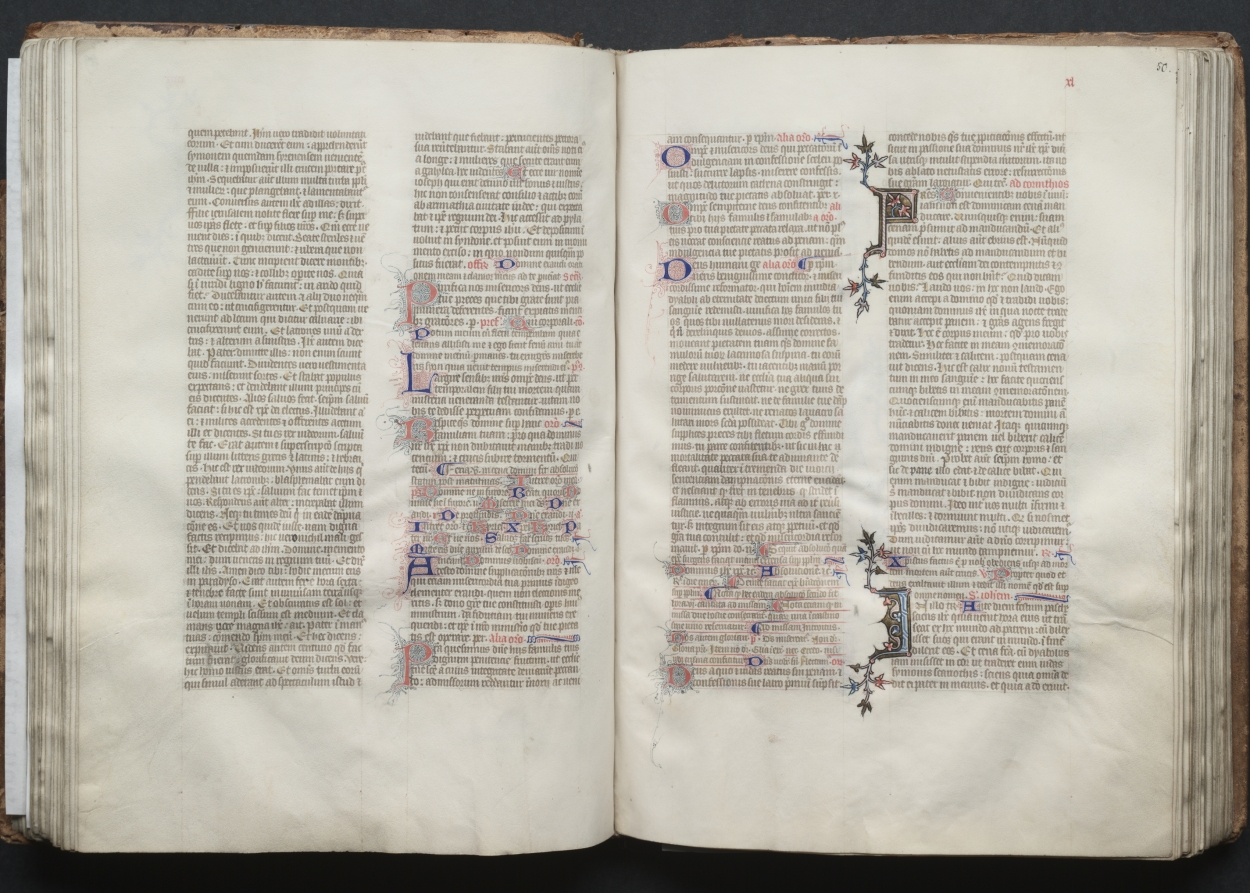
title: The Gotha Missal: Fol. 49v, Text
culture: France, Paris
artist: Master of the Boqueteaux (French)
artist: and Workshop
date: c. 1375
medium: ink, tempera, and gold on vellum; blind-tooled leather binding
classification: Bound Volume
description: The style and quality of this manuscript's decoration is typical of deluxe Parisian books made for aristocratic or royal patrons. Most of the book's decoration appears to be the work of the Master of the Boqueteaux, an artist active at the court of King Charles V (died 1380). His style was apparently shared by a number of book illuminators working in and around Paris. It is very possible that the Gotha Missal belonged to Charles V, but is not provable because the manuscript has no royal portraits and lacks a colophon. Given the book's magnificent decoration, however, it would seem that it was produced for a Valois prince, if not for the king himself. The manuscript receives its name from the German dukes of Gotha, its later owners.